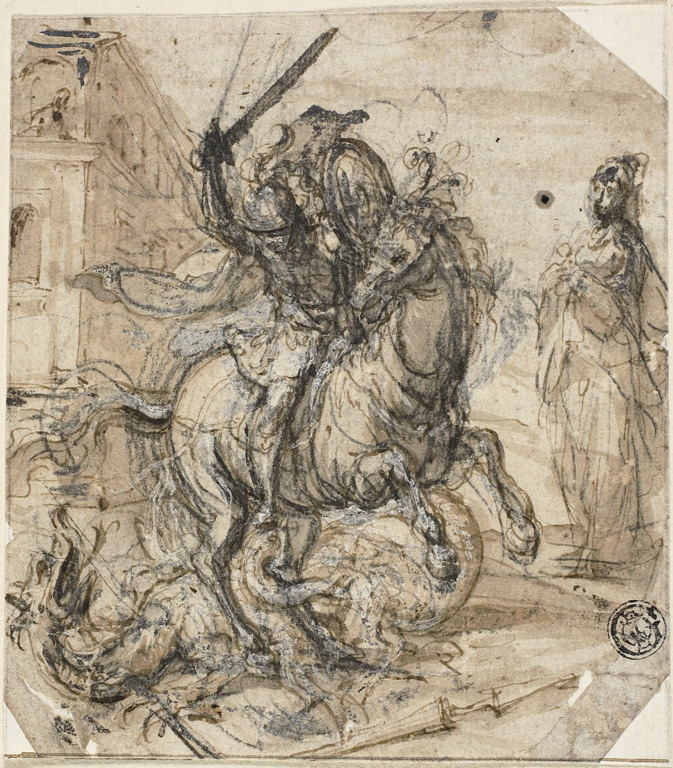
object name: Drawing and Watercolor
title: Saint George and the Dragon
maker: Attributed to Carlo Urbino; Italian, active 1535-1585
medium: Pen and brown ink, with brush and brown wash, heightened with lead white (partially discolored), over black chalk, on ivory laid paper, laid down on ivory laid paper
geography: Italy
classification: pen and ink drawings; drawings (visual works); prints and drawing